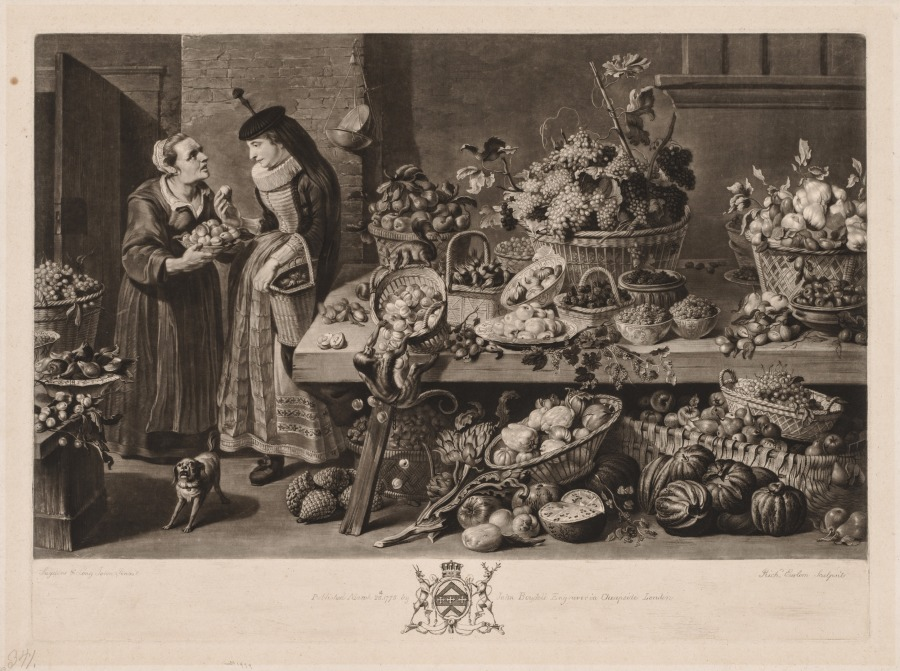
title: The Four Markets: The Fruit Market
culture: England, 18th century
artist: Richard Earlom (British, 1743–1822)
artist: after Frans Snyders (Flemish, 1579–1657)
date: 1775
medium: mezzotint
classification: Print